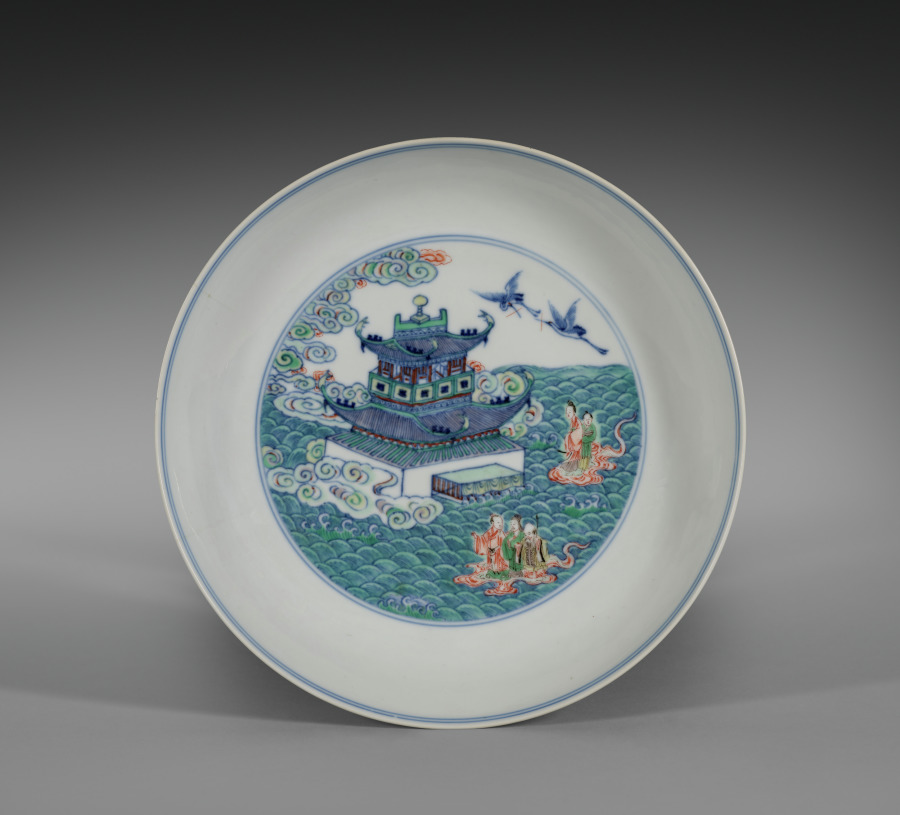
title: Plate with Isle of the Immortals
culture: China, Jiangxi province, Jingdezhen kilns, Qing dynasty (1644-1911), Yongzheng mark and reign (1723-35)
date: 1723–35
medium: porcelain decorated in underglaze cobalt blue and overglaze enamels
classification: Ceramic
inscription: 大清雍正年製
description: This multicolored dish is decorated with the sacred isle, also seen on the exterior of the blue-and-white dish nearby. A pavilion emerges amid rising and falling waves, a symbol of constant transformation and change. Above the waves are mysterious clouds, symbolizing the cosmic vital energy (qi) that animates all things and beings on earth in Daoism. The interior of the dish also shows cranes carrying sticks in their beaks, a motif that symbolizes longevity. Cranes carrying sticks above a pavilion in the sea express the wish “May you live to a ripe old age (haiwu tianchou; 海屋添籌).”